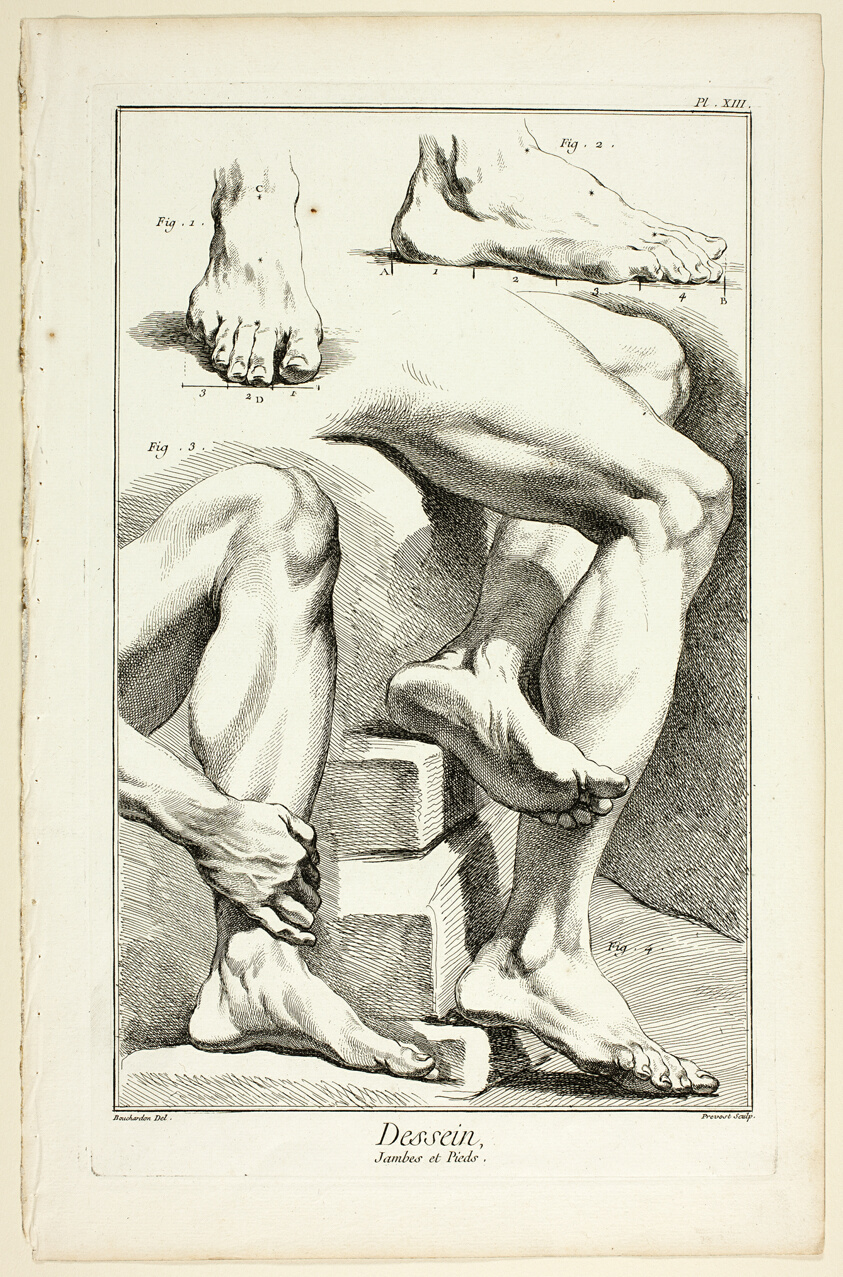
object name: Print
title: Design: Legs and Feet, from Encyclopédie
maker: Benoît-Louis Prévost (French, c. 1735-1809); after Bouchardon (probably Edme), (French, active 18th century); published by André le Breton (French, 1708-1779), Michel-Antoine David (French, c. 1707-1769), Laurent Durand (French, 1712-1763), and Antoine-Claude Briasson (French, 1700-1775)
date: 1762/77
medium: Etching, with engraving, on cream laid paper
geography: France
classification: etching; print; prints and drawing